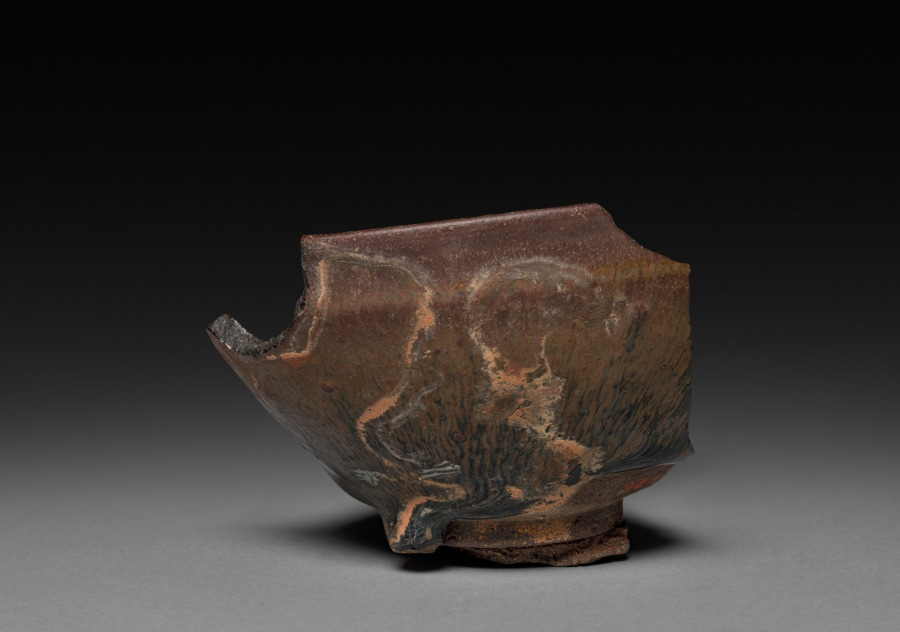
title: Shard of Tea Bowl: Jian ware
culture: China, near Shui ch'i, Song dynasty (960-1279)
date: 960–1279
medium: stoneware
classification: Ceramic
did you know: Jian ware was made of a very hard, coarse grain.